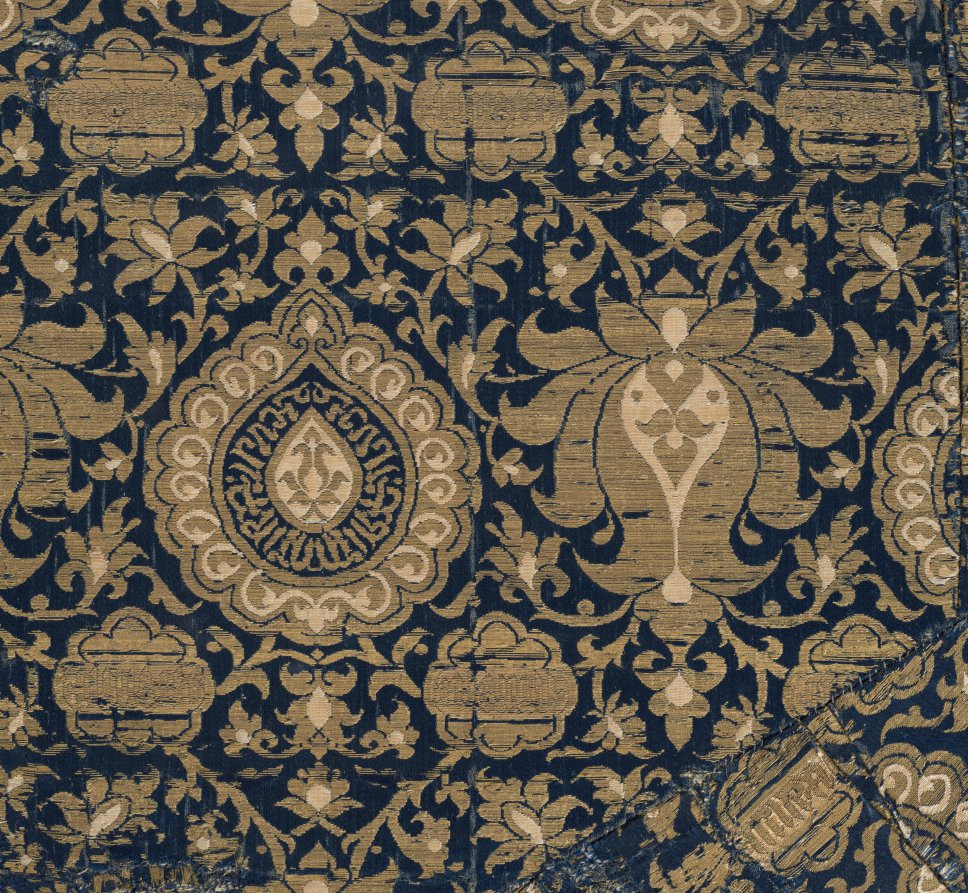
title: Mantle for a Statue of the Virgin with Lotus Blossoms and Medallions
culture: Egypt and Spain; Egypt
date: c. 1430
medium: Silk and gilt-metal thread: lampas weave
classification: Textile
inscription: Glory to our master, the sultan, the king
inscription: The sultan, the king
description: This costly royal silk with extensive gold thread was woven in Egypt and gifted or exported to Spain, where it was pieced into this mantle for a statue of the Virgin, probably to be worn during festivals and processions. The sturdy silk brocade foundation cloth was also woven with a lighter weight silk damask with a repeating mirror image. Therefore, the Arabic inscription in the medallions reads both forward and backward: Glory to our master, the sultan, the king. The inscribed lobed roundels say The sultan, the king.